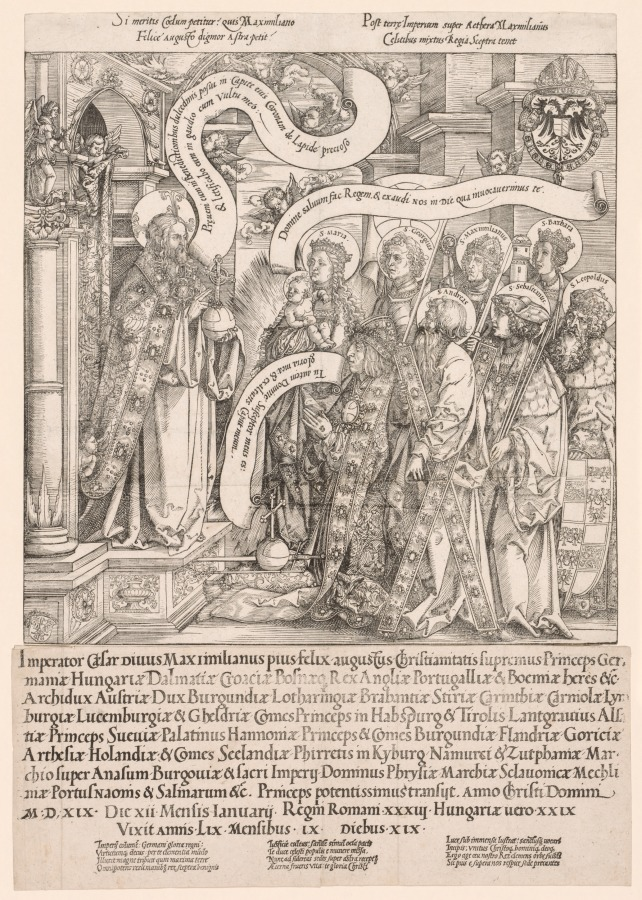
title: Maximilian Presented by His Patron Saints to the Almighty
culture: Germany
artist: Hans Springinklee (German, 1540)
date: 1519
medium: woodcut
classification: Print